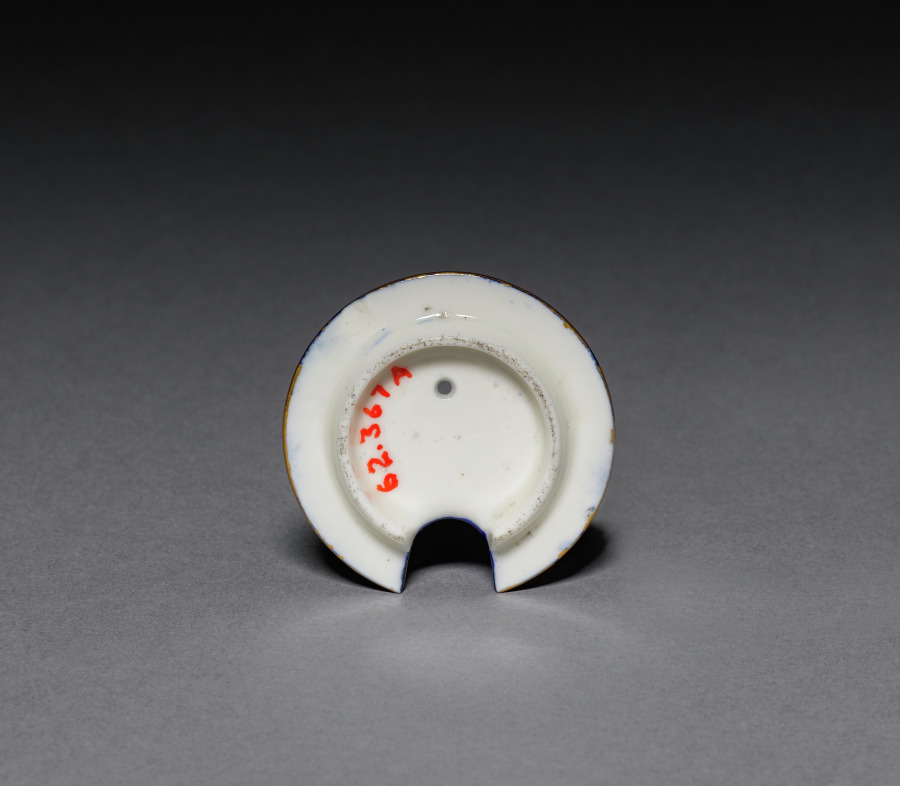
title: Cover for a Mustard Pot with Stand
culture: France, Chantilly, 18th century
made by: Chantilly Porcelain Factory (French)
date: c. 1775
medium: soft-paste porcelain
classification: Ceramic